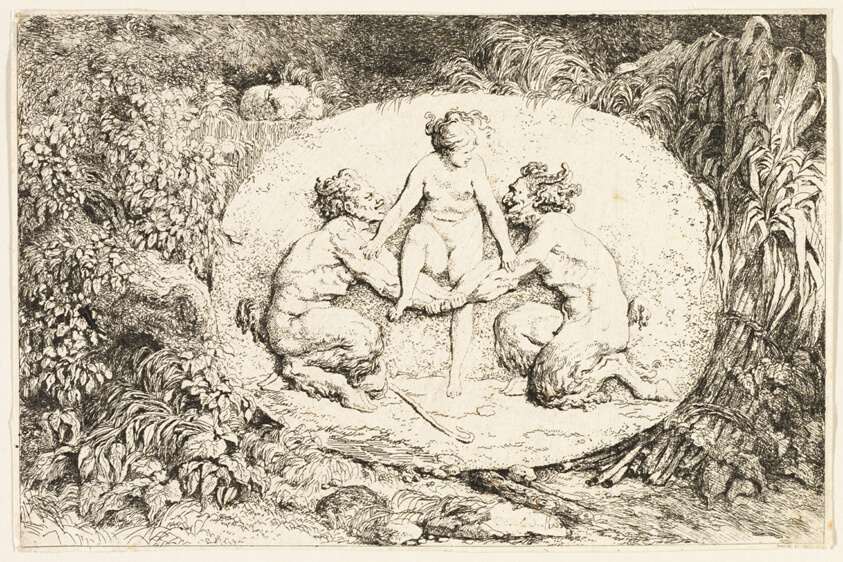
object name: Print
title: Nymph Sitting on the Hands of Two Satyrs from Bacchanales, or Satyrs' Games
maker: Jean-Honoré Fragonard; French, 1732-1806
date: 1763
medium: Etching on ivory laid paper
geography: France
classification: etching; print; prints and drawing